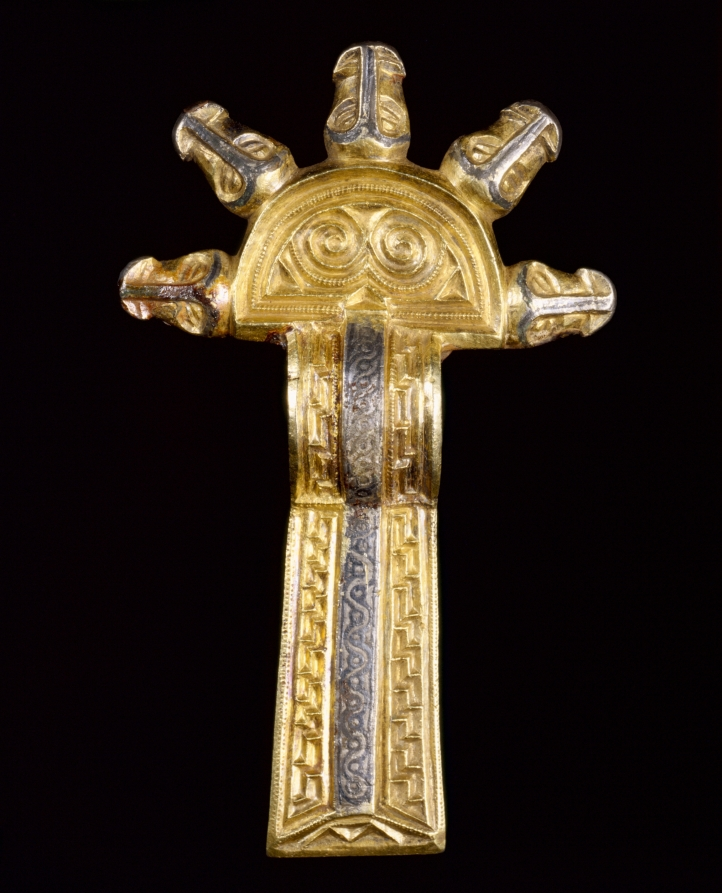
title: Fibulae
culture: Alemannic, Migration Period, 6th-7th century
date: 500s-600s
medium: cast silver, parcel-gilt, with niello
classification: Jewelry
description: A woman of high rank might have worn these twin fibulae on her shoulders, one fastening her inner garment on the right, the other her outer garment on the left. She might also have suspended them from her belt as decorative ornaments.